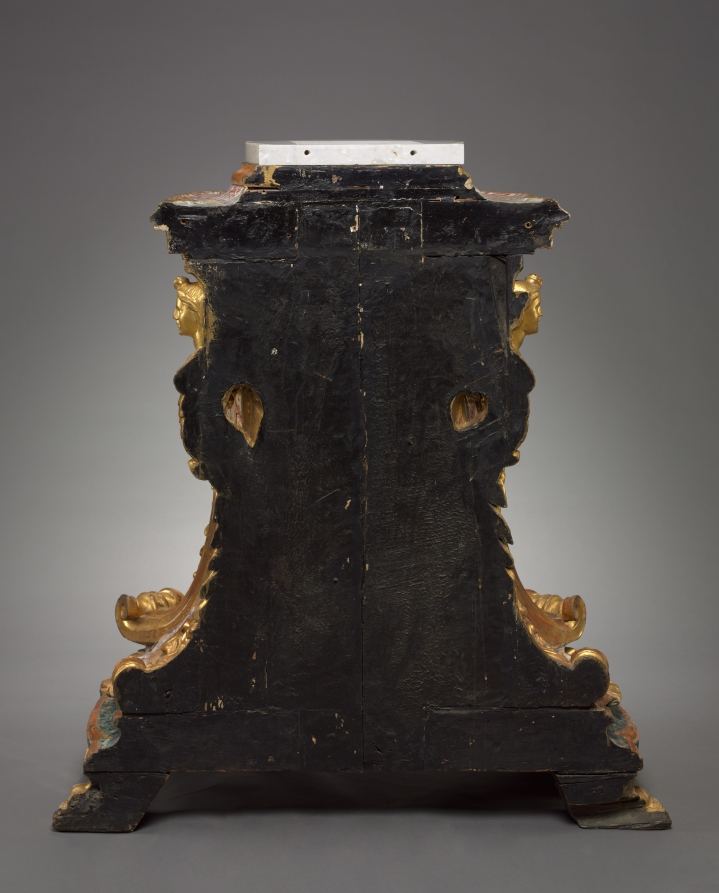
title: Pedestal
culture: Italy, Rome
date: mid-1700s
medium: carved, gilded, and painted wood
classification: Furniture and woodwork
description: The coat of arms on this pedestal is that of Cardinal York, the last of the Stuart pretenders to the British throne. He lived out his years in Rome, where he had been made a cardinal of the Church.